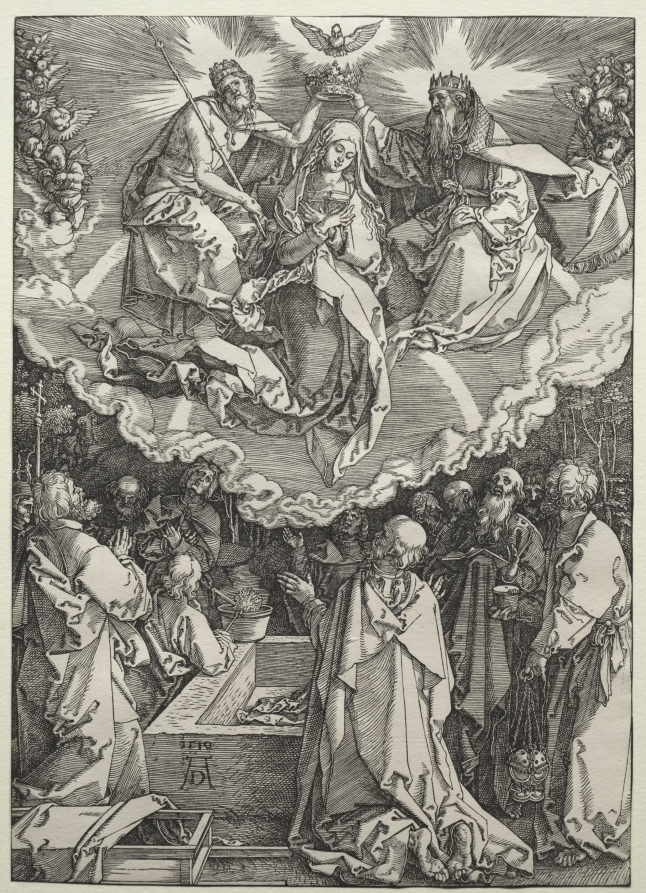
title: The Assumption and Coronation of the Virgin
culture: Germany, early 16th Century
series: The Life of the Virgin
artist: Albrecht Dürer (German, 1471–1528)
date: 1510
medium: woodcut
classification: Print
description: Dürer depicted the scene of the Virgin’s death (1959.99.18) as an intimate one, with the apostles keeping vigil around her deathbed. Three days later they witnessed Mary’s bodily assumption into paradise where she was crowned the Queen of Heaven (1959.99.19). The final print (1959.99.20), which some believe was conceived independently from the series because it falls outside of the typical narrative, shows the Virgin in a domestic setting surrounded by several saints, angels, and putti that celebrate her life-an especially fitting way to end the series.